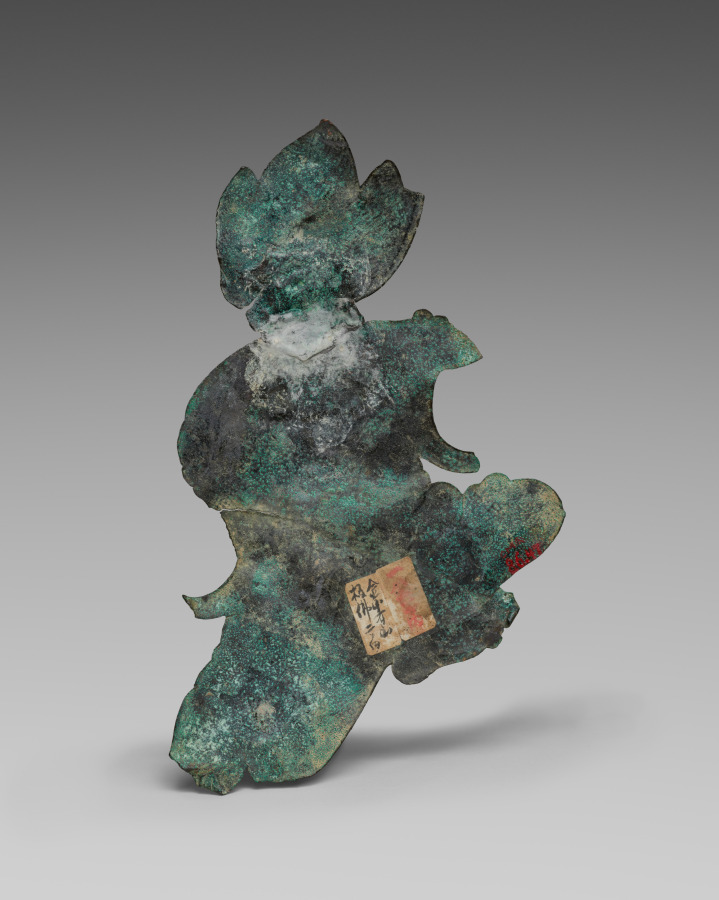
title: Zaō Gongen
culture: Japan, Heian period (794–1185)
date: 1100s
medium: Gilt bronze with repoussé and incised details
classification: Metalwork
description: Zaō Gongen is the deity of Mount Kinpu, in the Yoshino Mountains south of Nara. This fragment is from a votive mirror called a kakebotoke with metal fittings at the top through which a cord could be used to hang it.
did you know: This votive mirror would have been hung in a temple or shrine.